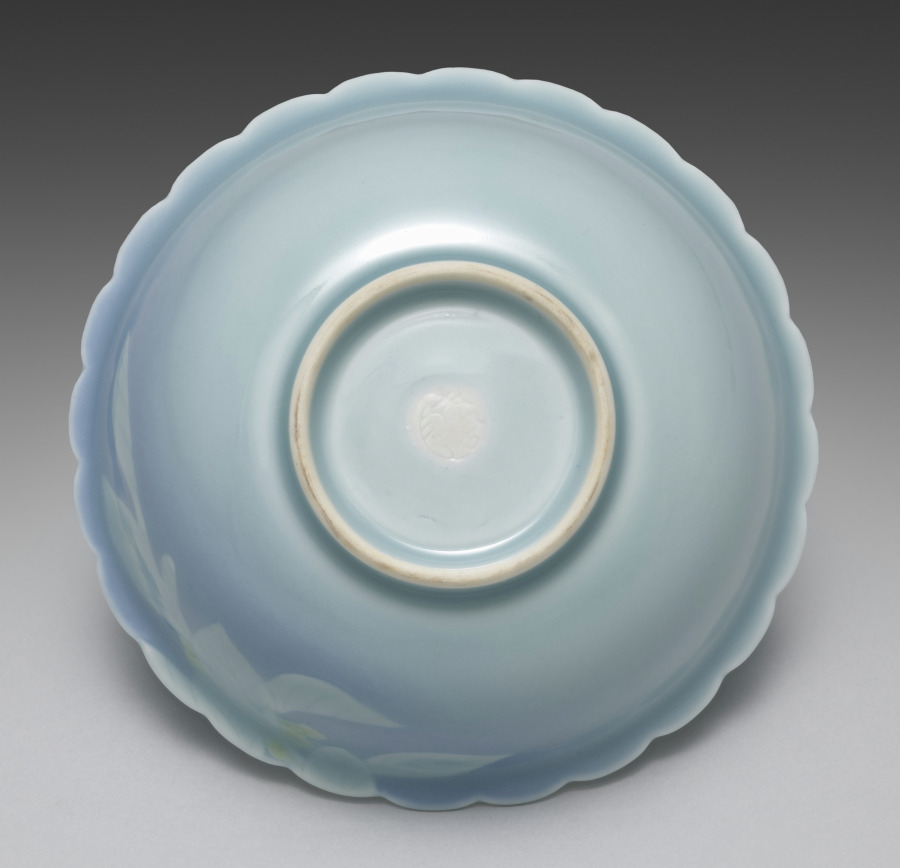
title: Dish from Dishes with Flowers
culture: Japan, Taishō period (1912–26) or Shōwa period (1926–89)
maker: Seifū Yohei IV (Japanese, 1872–1951)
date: 1914–46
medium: One from a set of five dishes; porcelain with underglaze yellow and blue glaze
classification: Ceramic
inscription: 清風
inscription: 清風造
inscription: 成山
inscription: 清風盧人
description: One can imagine a cool summer breeze when looking at this set of dishes, each shaped with a crenulated mouth and glazed with blue. Around the rim and into the basin, the bowls have low-relief designs of flowers with underglaze yellow petals; their leaves and stems show white through the glaze. On each dish, the design continues over the rim onto one side.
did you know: Seifū Yohei IV’s dishes with flowers feature underglaze yellow.